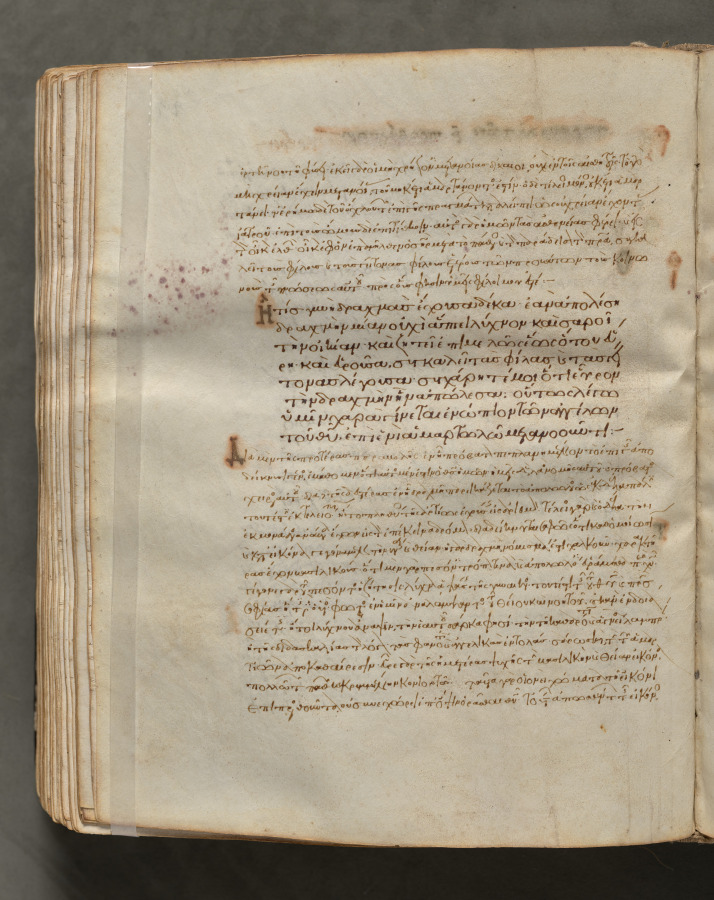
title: Text, folio 280 (verso), from a Gospel Book with Commentaries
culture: Byzantium, Constantinople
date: c. 1000–1100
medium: ink, tempera, and gold on vellum; leather binding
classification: Bound Volume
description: Each of the four gospels in this book opens on a page with brilliantly illuminated borders depicting the author of the text as well as birds—principally peacocks, symbols of the immortality of the soul—and fountains, representing the fountain of life and the salvation of the soul. This volume consists of 428 leaves with texts in Greek. Its level of sophistication suggests that it was probably written and decorated in a monastery in Constantinople.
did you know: Gospel books were carried in procession through Byzantine churches.